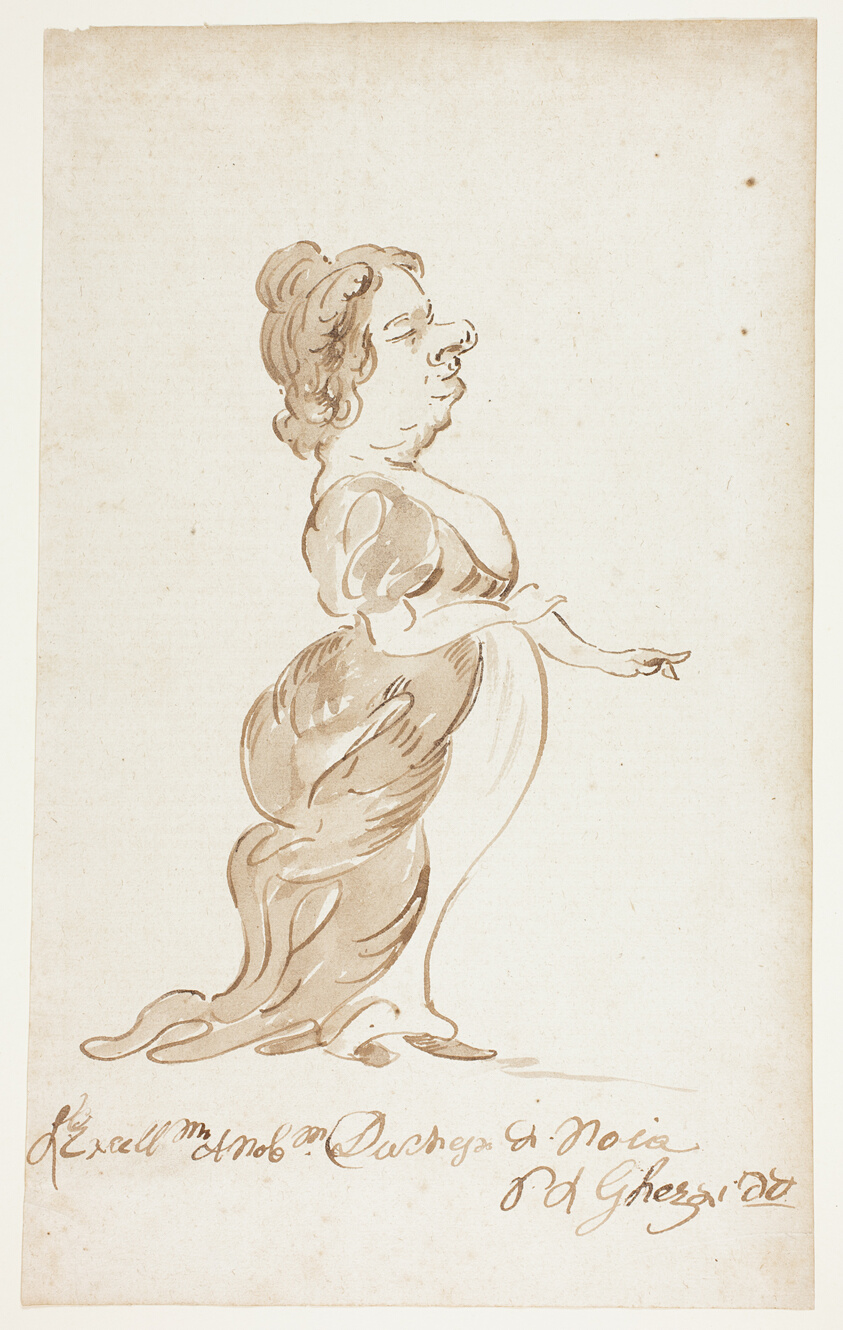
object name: Drawing and Watercolor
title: The Duchess of Noia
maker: Attributed to Pier Leone Ghezzi; Italian, 1674-1755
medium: Pen and brown ink, with brush and brown wash, on ivory laid paper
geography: Italy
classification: pen and ink drawings; drawings (visual works); prints and drawing